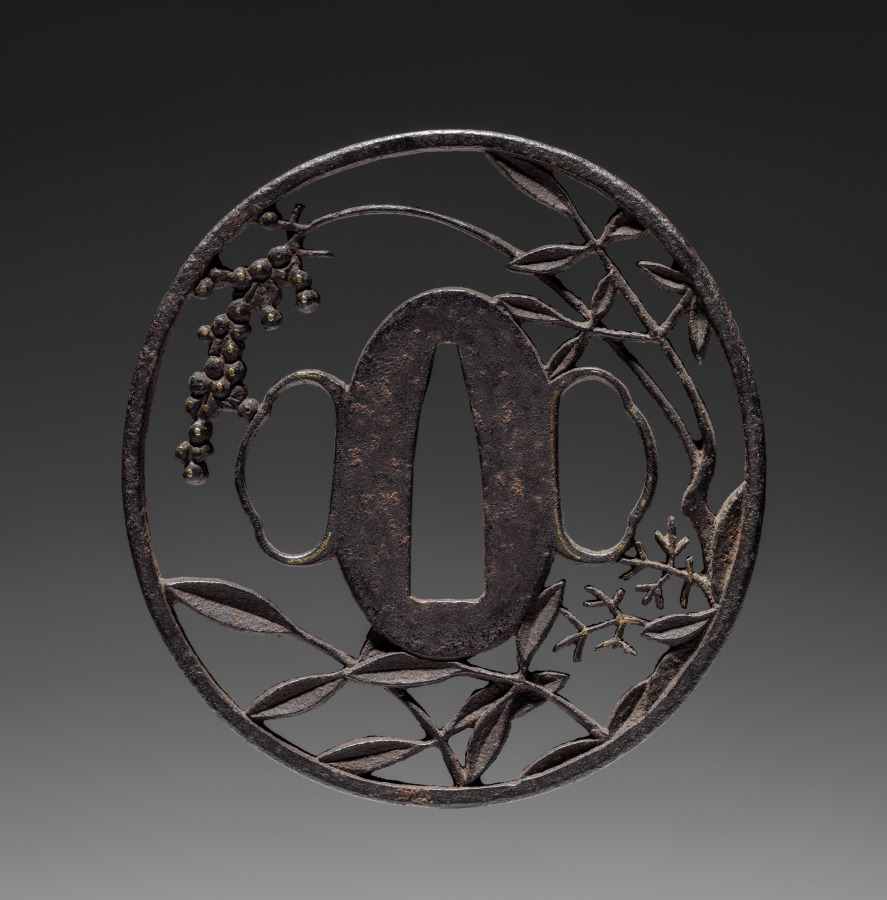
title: Sword Guard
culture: Japan, Edo period (1615–1868)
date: 1615–1868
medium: iron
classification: Arms and Armor